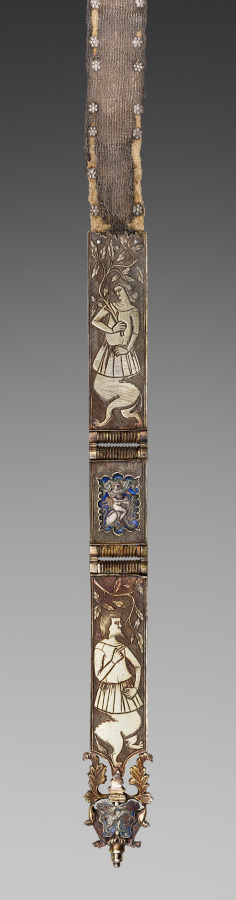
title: Belt for a Lady's Dress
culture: Italy, Siena(?)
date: c. 1375–1400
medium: basse-taille enamel and gilding on silver, silver thread, gilt-silver buckle, cast and chased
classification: Jewelry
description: Because of its extraordinary richness, this belt (also known as a girdle) was both an ornament for the body and an object of great personal luxury. Almost eight feet in length, belts like this were at the height of fashion for both men and women. After being passed around the waist and through the buckle, one end of the belt would fall to the hem of the garment. The belt's many colorful enamel plaques are worked in translucent enamel over decoration engraved into the silver beneath (an enameler's technique known as basse-taille). Within the plaques and cast into the buckle are scenes of courtly love, musicians, and fantastic animals. A large number of translucent enamels were made for secular objects during the late Middle Ages for use on jewelry, cups, garment clasps, and similar objects. This belt is a rare survival among these now scarce objects.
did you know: Look closely at the tiny scenes of courtly love on the plaques that adorn this belt. Given their size, these scenes were designed for the enjoyment of the woman who wore this belt over a sumptuous dress rather than an admirer from a distance.